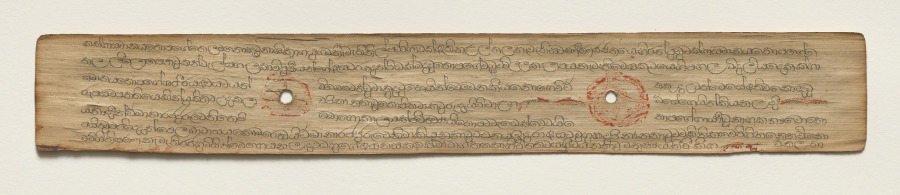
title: Leaf from a Buddhist Manuscript (verso)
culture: Sri Lanka, Singhalese, Late 17th century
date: c. 1700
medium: fiber paper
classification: Manuscript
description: Palm leaf material is still used for manuscripts in Sri Lanka. The palm leaves are prepared first by boiling them, drying them in the sun, and then rubbing them with oils. Scribes then use a metal stylus to incise the text. Then charcoal powder is wiped across the pages, filling in only the inscribed lines.